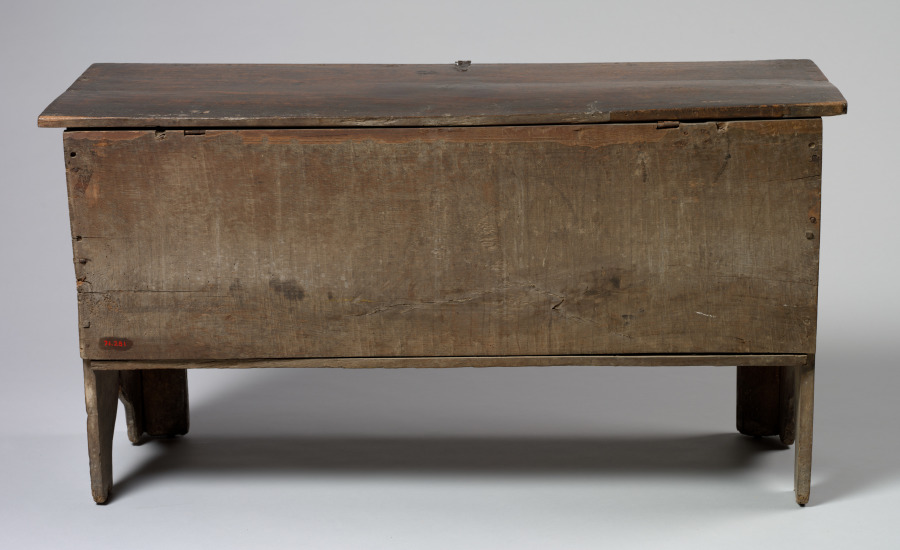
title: Chest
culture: England, late 15th - early 16th centuries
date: c. 1490–1520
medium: oak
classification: Furniture and woodwork